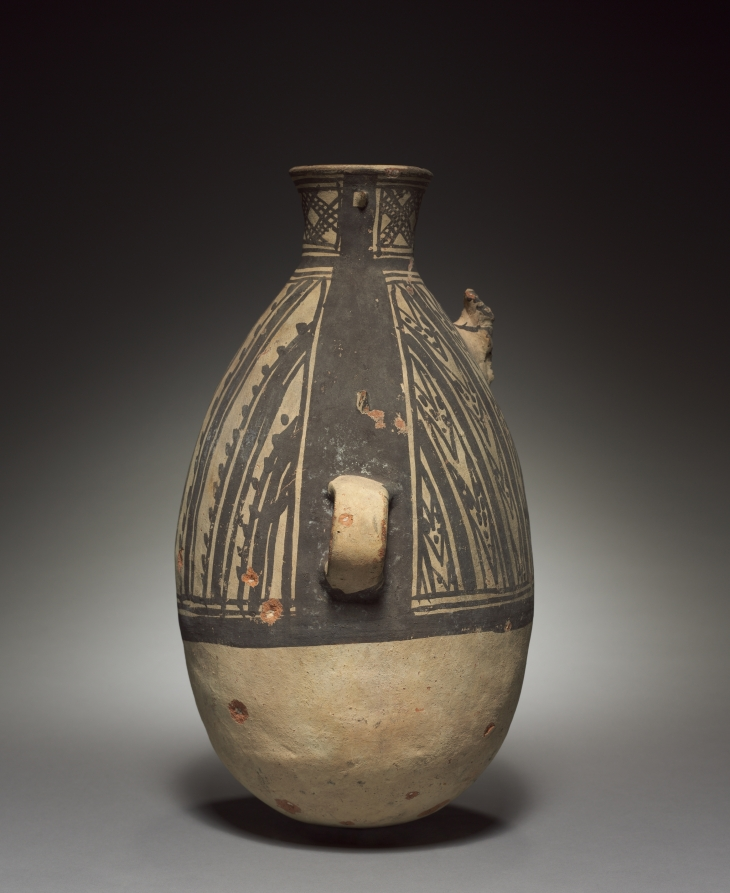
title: Bottle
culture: Peru, Chimú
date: 800–1500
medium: pottery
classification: Ceramic